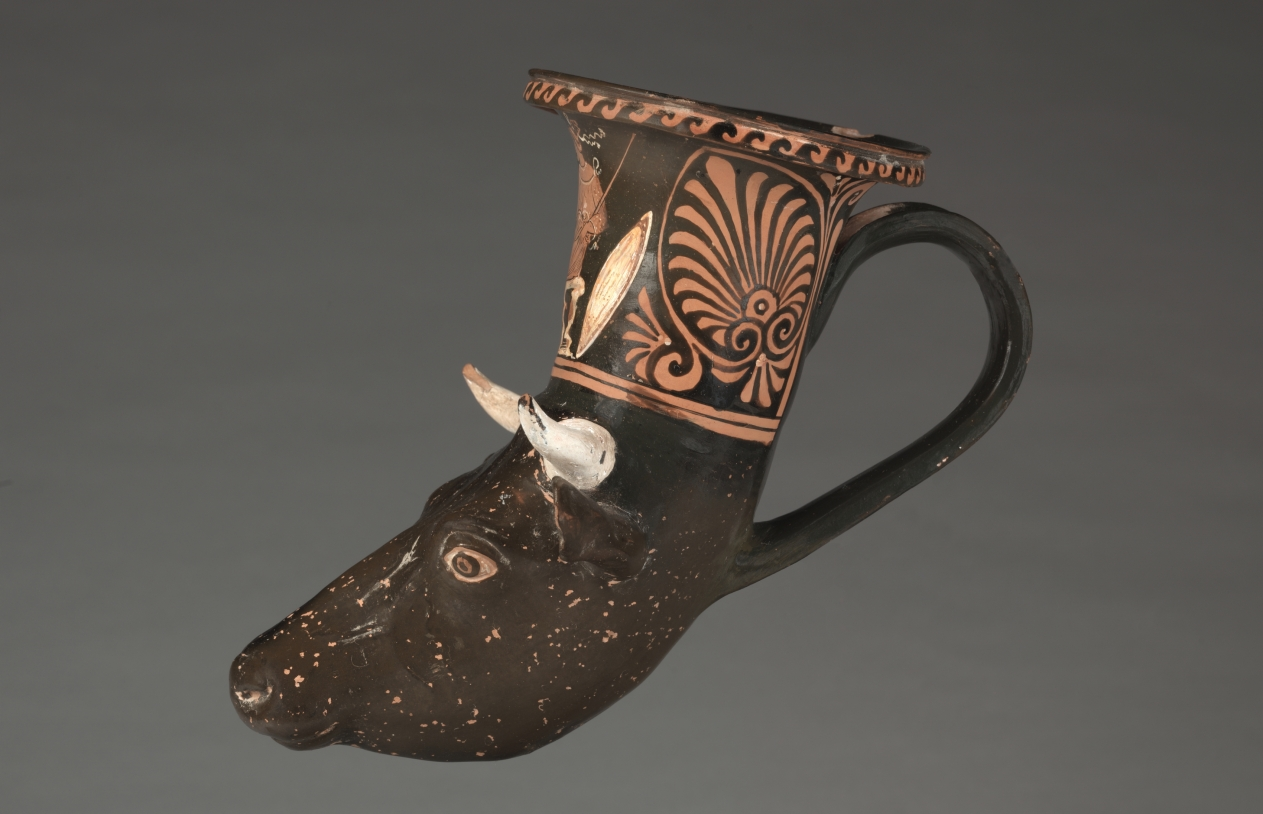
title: Red-Figure Cow-Head Rhyton (Drinking Horn): Seated Woman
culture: South Italian, Apulian, Tarentine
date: c. 340 BCE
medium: ceramic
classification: Ceramic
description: Rhyta (drinking horns) in the forms of animal heads were popular ceramic products in Apulia c. 350-320 BC. Mold-made heads were attached to wheel-made bowls, with separately made handles (plus ears and horns, for this cow). On the bowl, a seated woman holds a helmet and spear, with a shield nearby; she may represent Athena, although the helmet differs from her usual type and she does not appear to wear her snaky aegis (breastplate).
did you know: The cow-head rhyton was the most popular of all Apulian animal-head rhyta.